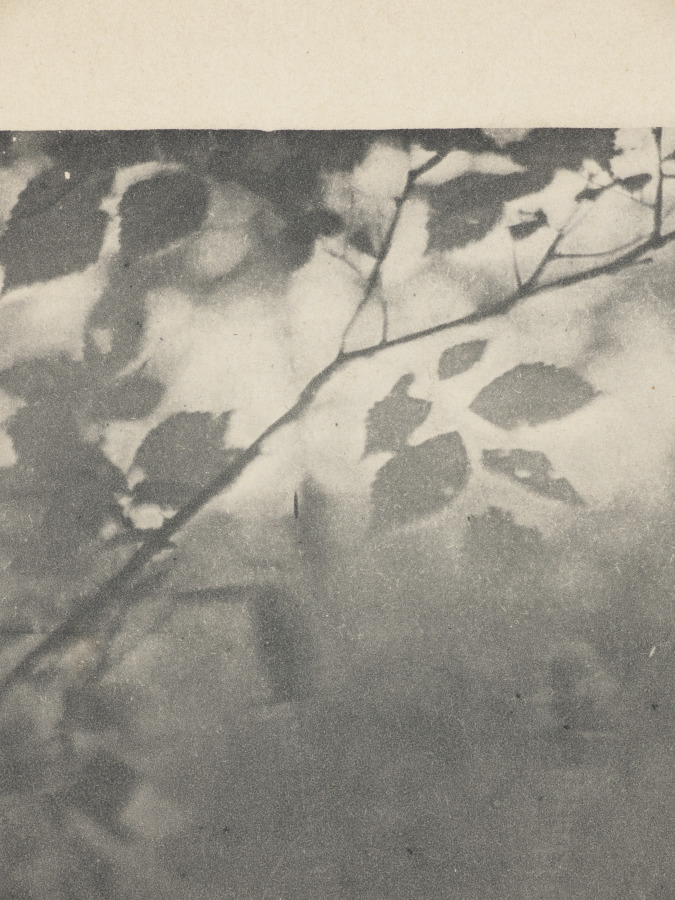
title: The Edge of the Wood - Evening (Letitia Felix)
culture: America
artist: Clarence H. White (American, 1871–1925)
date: 1900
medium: photogravure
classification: Photograph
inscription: Written in pencil on recto: "Clarence H. White [signed] '00"; in pencil on verso: " 'The Edge of the Wood-Evening'- / Clarence H. White"; in pen on verso: "Letitia Felix"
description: Clarence H. White experimented with an array of artistic media that blurred the lines between photography, drawing, and printmaking. Here are two examples of that experimentation: a platinum print on the left and a photogravure on the right. White was likely drawn to both processes for their broad tonal range and interaction of image and paper. To create platinum prints, a light-sensitive liquid emulsion is applied to and absorbed by the paper. The image forms within the paper’s fibers, resulting in a matte appearance. Because photogravures are printed like an etching, the image is formed with ink impressed onto the paper’s surface.